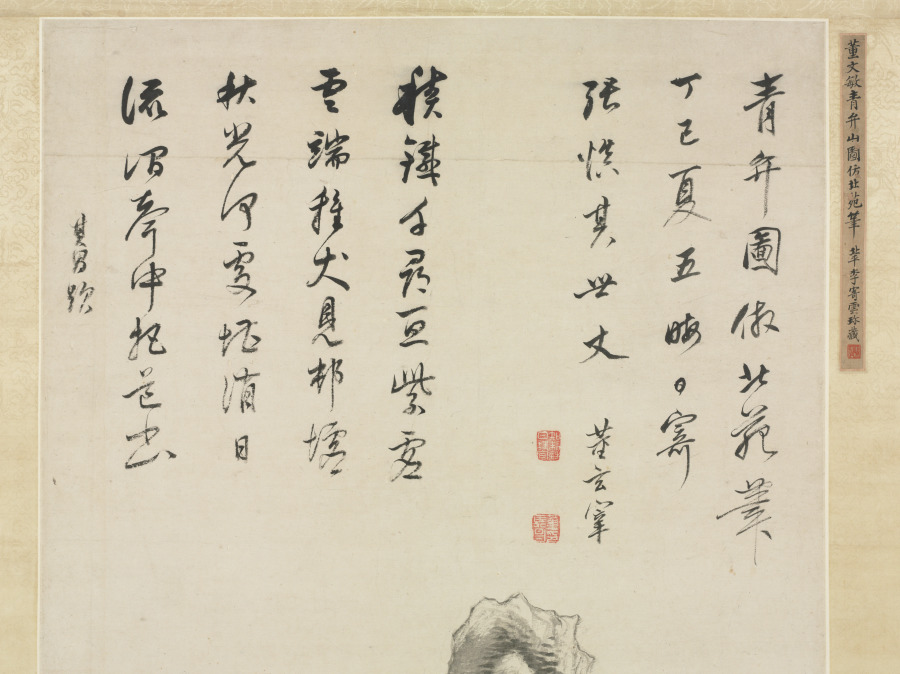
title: Mt. Qingbian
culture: China, Ming dynasty (1368–1644)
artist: Dong Qichang (Chinese, 1555–1636)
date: 1617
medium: hanging scroll, ink on paper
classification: Painting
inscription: Artist's first inscription, signature, and 2 seals: A painting of the Qingbian Mountains in the manner of Beiyuan [Dong Yuan]. In the summer of the dingsi year [1617], on the last day of the fifth month, [I] send this to my senior, Zhang Shenqi. Dong Xuanzai [seals] Zhi zhi hao ri jiang guan 知制誥日講官; Dong Qichang yin 董其昌印.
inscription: Artist's second inscription and signature: Piling irons for ten thousand feet guard the purple sky;/ Where puppies are seen on top of clouds, villages and marketplaces lie./ In the splendor of autumn, where is the most worthy spot to spend the day?/ Amid the rustling sounds of mountain streams, with a volume in hand, meditating on the Way [Dao]. Inscribed by Qichang. (trans. WKH/LYSL)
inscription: 4 additional seals: 3 of Li Enqing 李恩慶 (jinshi of 1833); 1 of Weng Wan-go 翁萬戈 (b. 1918).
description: Dong Qichang radically transforms the landscape composition into a purely abstract design. He organizes the mountain forms to achieve an overall sense of structure, activating the flow of energy (qi) and the momentum of force (shi) throughout the pictorial design. In his art, brush and ink assume life independent of the depicted forms, so that the painting can be appreciated for “the sheer marvels of brush and ink.”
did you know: Dong Qichang had visited the Bian Mountains, which are part of a low range located not far from Wuxing and Lake Tai in the southern province of Zhejiang.